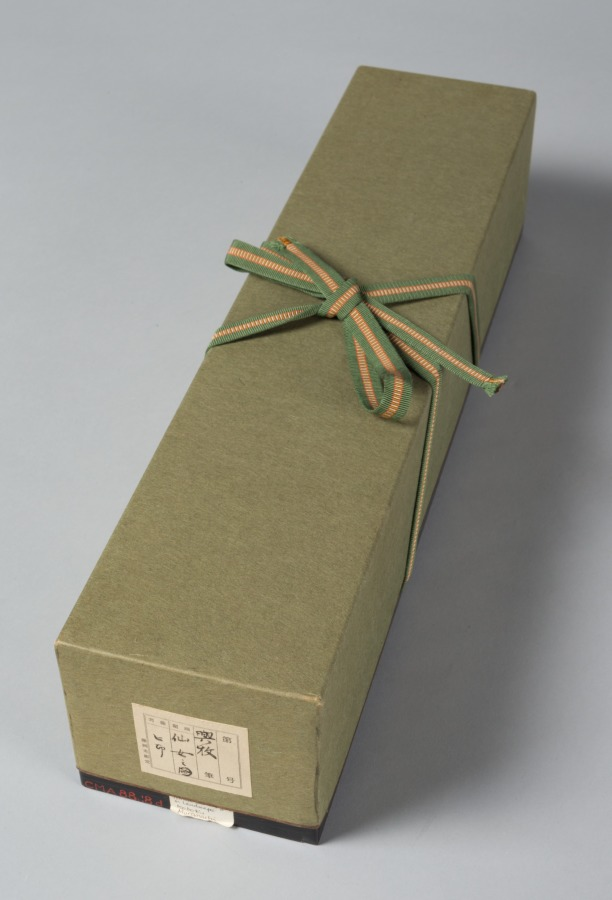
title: Female Daoist Figure in Landscape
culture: Japan, Muromachi period (1392–1573)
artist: Kōboku (Japanese)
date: early 1500s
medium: hanging scroll; ink on paper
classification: Painting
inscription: 「興牧」（朱文方印）